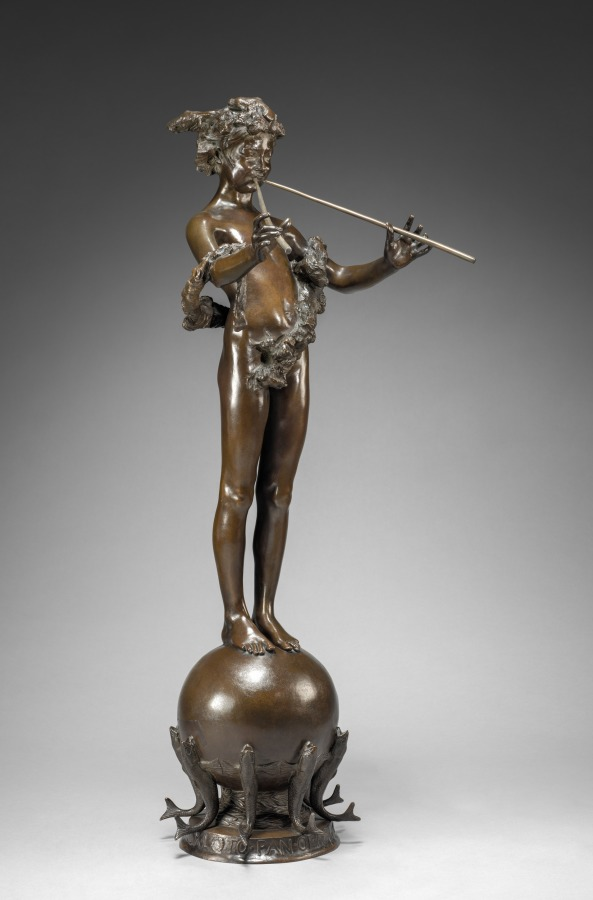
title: Pan of Rohallion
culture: America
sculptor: Frederick William MacMonnies (American, 1863–1937)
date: 1890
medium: bronze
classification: Sculpture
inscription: Signed on globe: Frederick MacMonnies, Paris 1890. © 1894. Inscribed around base: TO PAN OF ROHALLION ANNO DOMINI MDCCCLXL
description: Rohallion in the title refers to the name of an estate in New Jersey, whose owner commissioned MacMonnies to create a large fountain of this design for a garden pool. Later, the artist made several smaller versions, such as this example. Here, the ancient Greek god Pan plays his musical pipes while standing on an orb supported by fish.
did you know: The character of Peter Pan, including his flute playing, references the Greek god Pan.